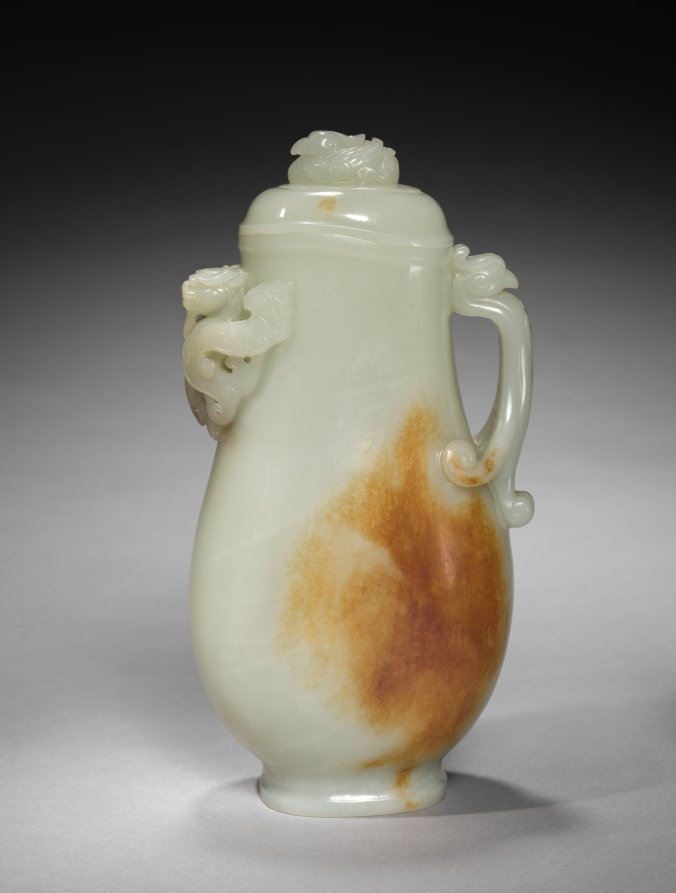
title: Pitcher (Gong) with Dragon and Bird-Headed Handle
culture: China, Qing dynasty (1644–1911)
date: 1700s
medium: pale greenish-white jade with brown markings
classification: Jade